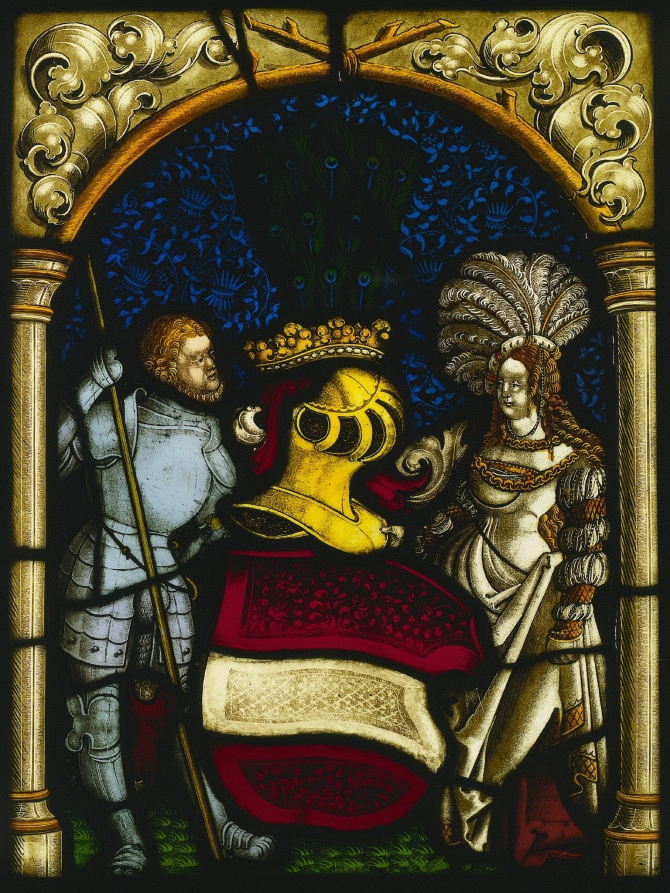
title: Heraldic Panel Depicting a Knight and a Lady with the Arms of the Archduchy of Austria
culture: Switzerland, Germany, or Austria, 16th century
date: c. 1515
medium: white glass with silver stain, sanguine, and pot metal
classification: Glass